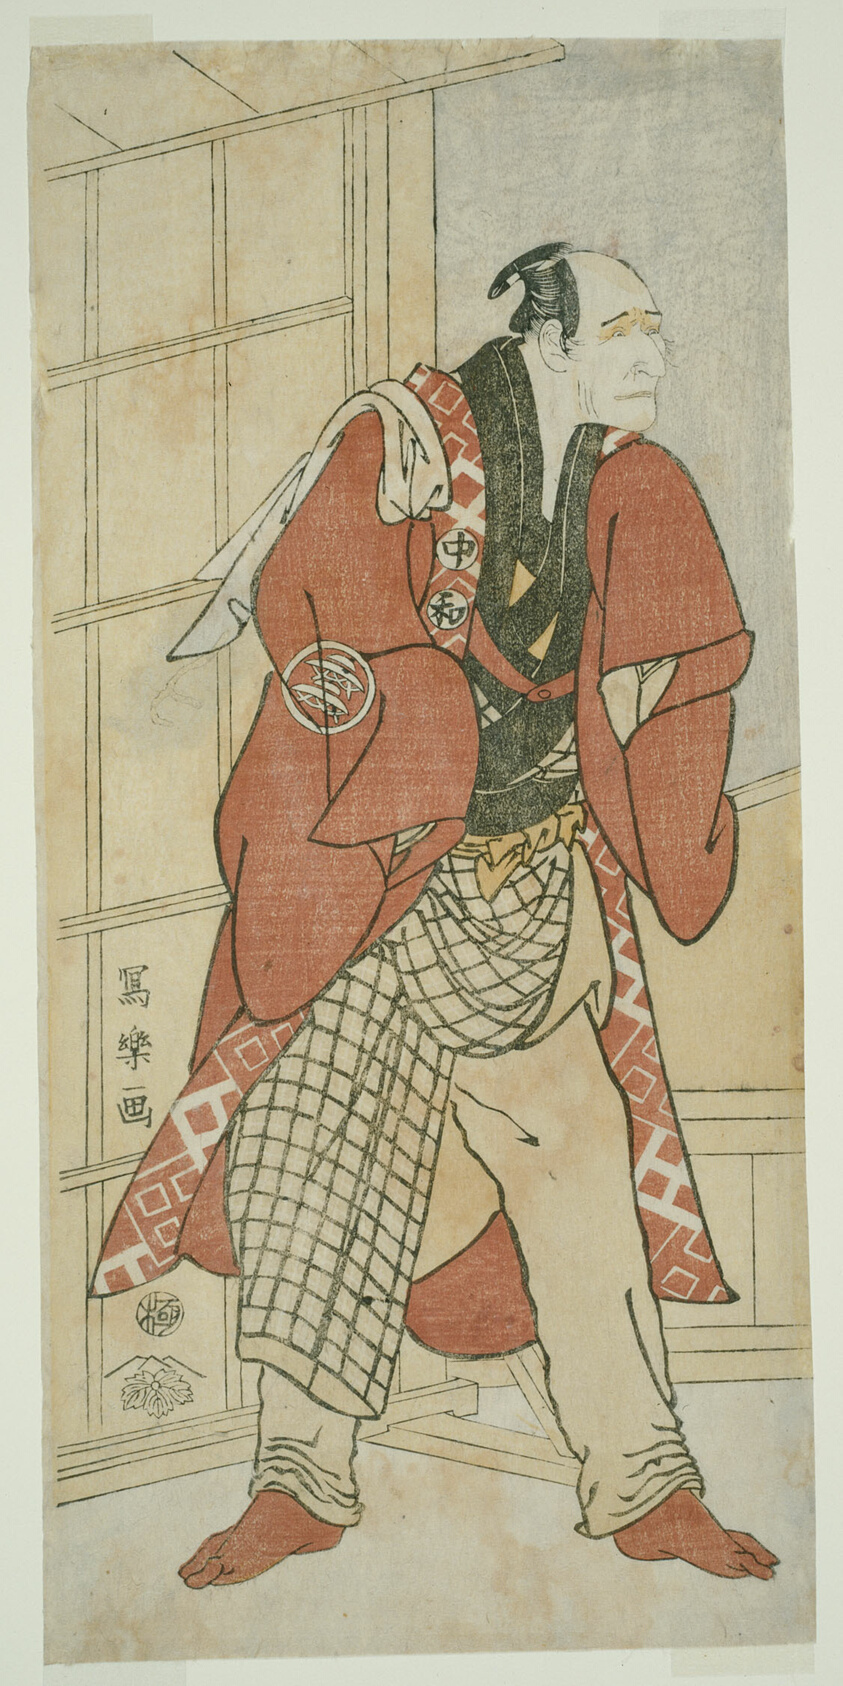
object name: Print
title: The Actor Nakajima Wadaemon as Migawari no Jizo, the Master of the House, from Inamuragasaki in Kamakura (Nakajima Wadaemon no Kamakura Inamuragaasaki no yanushi, Migawari no Jizo)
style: Japanese (culture or style)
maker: Toshusai Sharaku 東洲斎 写楽; Japanese, active 1794-95; Publisher: Tsutaya Juzaburo; Japanese, 1748-1797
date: 1794 (Kansei 6)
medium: Color woodblock print; hosoban, nishiki-e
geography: Japan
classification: woodblock print; print; asian art